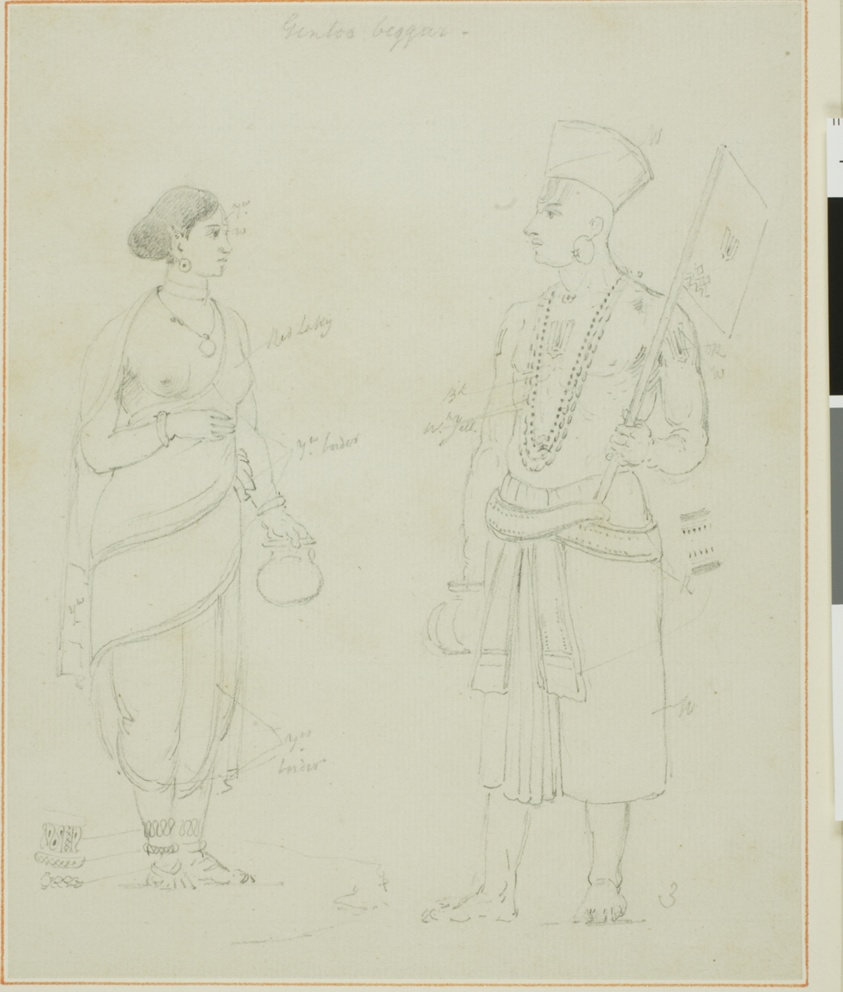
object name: Drawing and Watercolor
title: Gintoo Beggars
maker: Thomas Daniell (English, 1749-1840)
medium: Graphite on grayish-ivory laid paper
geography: England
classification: graphite; drawings (visual works); prints and drawing